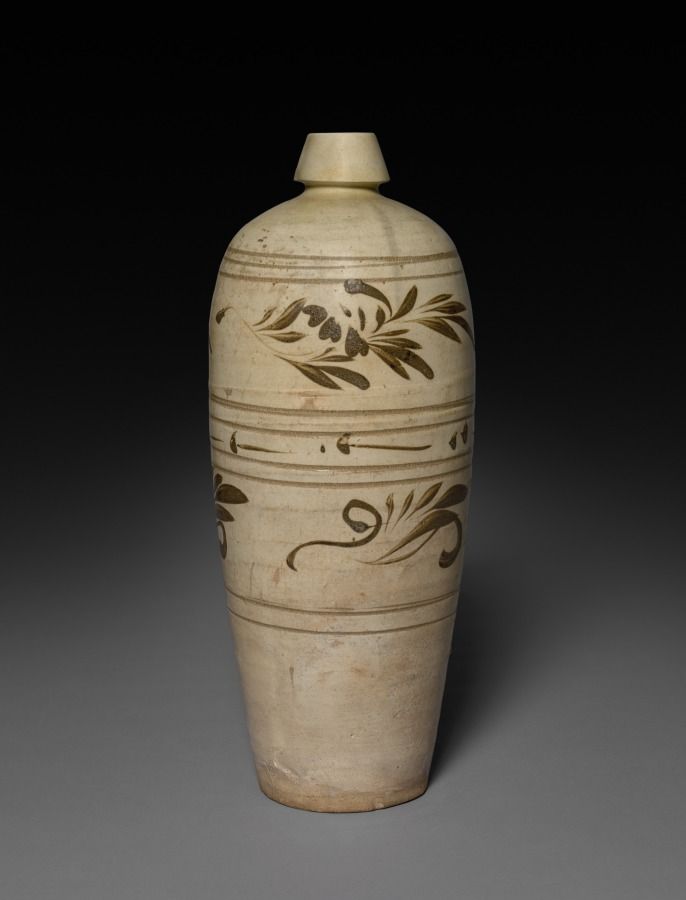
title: Meiping (Plum Blossom) Vase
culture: China, Northern Song dynasty (960-1127) - Jin dynasty (1115-1234)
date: 1100s–1200s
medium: Buff stoneware, slip coated with painted underglaze decoration, Cizhou ware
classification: Ceramic